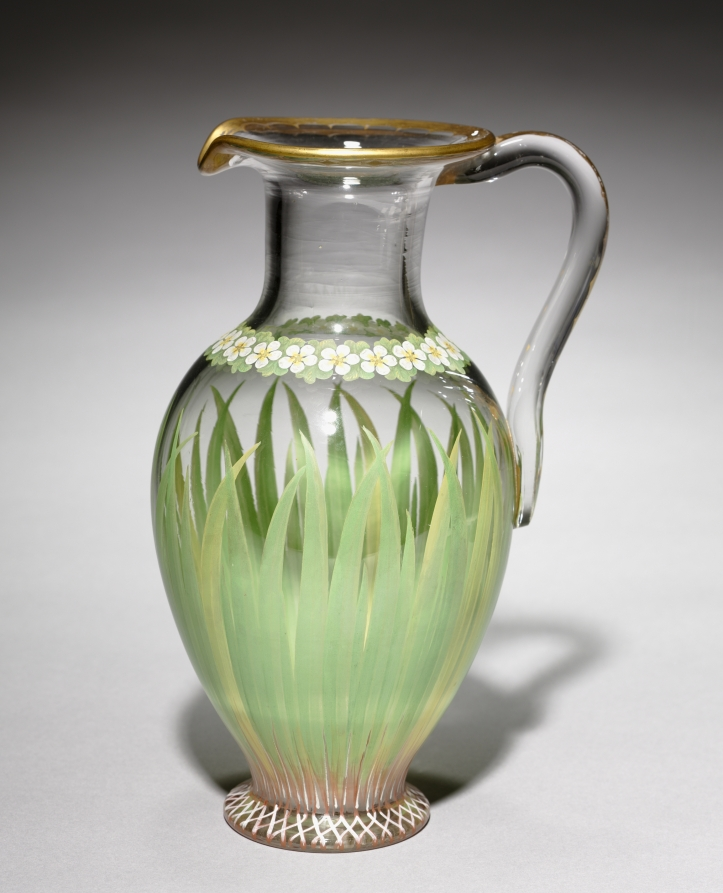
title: Jug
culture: England, 19th century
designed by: Richard Redgrave (British, 1804–1888)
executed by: J. F. Christy, Stangate Glass Works (British)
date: 1847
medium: glass, enamel decoration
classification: Glass